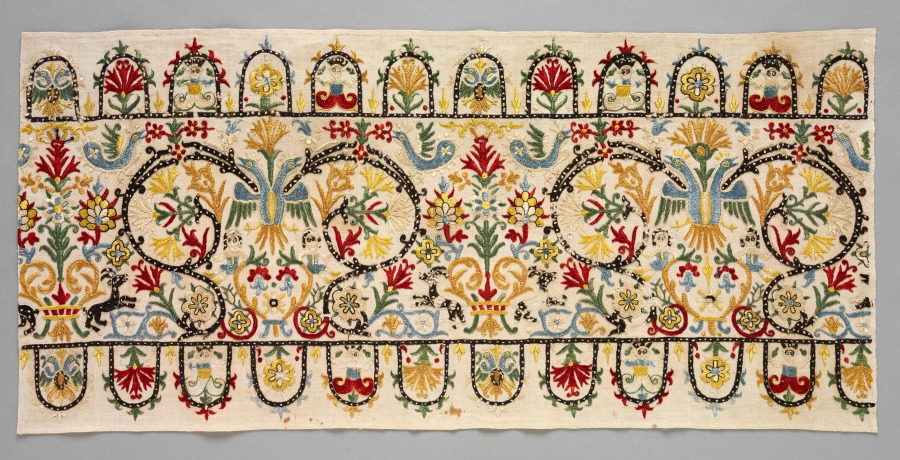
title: Border Strips of a Skirt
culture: Greece, Crete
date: 1600s–1700s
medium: Silk on linen tabby ground; embroidery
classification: Embroidery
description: The primary motif is a large stylized flowering vase with fantastic flowers and foliage, two small figures sitting among the foliage, two birds at the top eating flowers and, in the center, a double-headed eagle. Two of these motifs appear on the large strip, separated by a much smaller flowering vase with two goat-like animals at the base. At the top and bottom is a border of arched compartments containing, alternately, a flower and a two-tailed mermaid or a double-headed eagle.